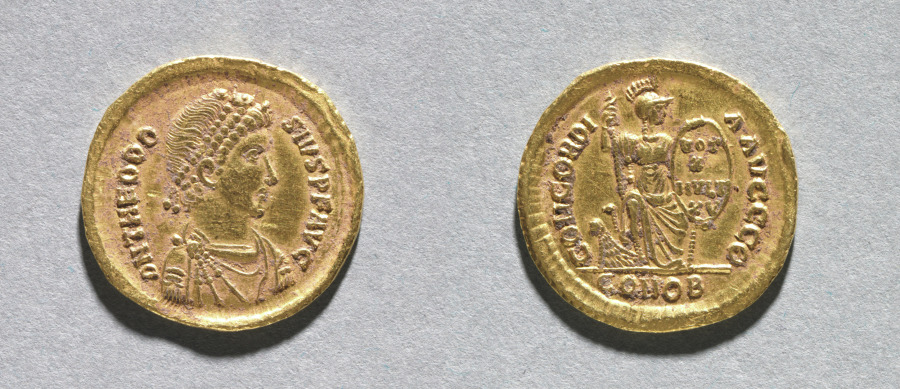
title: Solidus of Theodosius I the Great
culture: Byzantium, Constantinople, Byzantine period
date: 383–88 CE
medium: gold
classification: Coins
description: Byzantine Gold Coins The vast number of surviving Byzantine coins attests to the level of trade across the empire. Controlled and supervised by the emperor, the producers of coins took care to represent his authority and reflect his stature. Talented artists were recruited to engrave the dies (molds) used for the striking of coins. Emperors increasingly came to include their heirs and co-emperors on their coinage, as well as other family members or even earlier rulers. Coins were recognized, then as now, as small, portable works of art. With their inscriptions and images, Byzantine coins provide valuable documentation of historical events and a record of the physical appearance of the emperors. The coins shown here include the solidus, the basic gold coin of 24 karats; the tremissis, a gold coin of one-third the weight and value of the solidus; and the nomisma, which in the 10th century replaced the solidus as the standard gold coin.